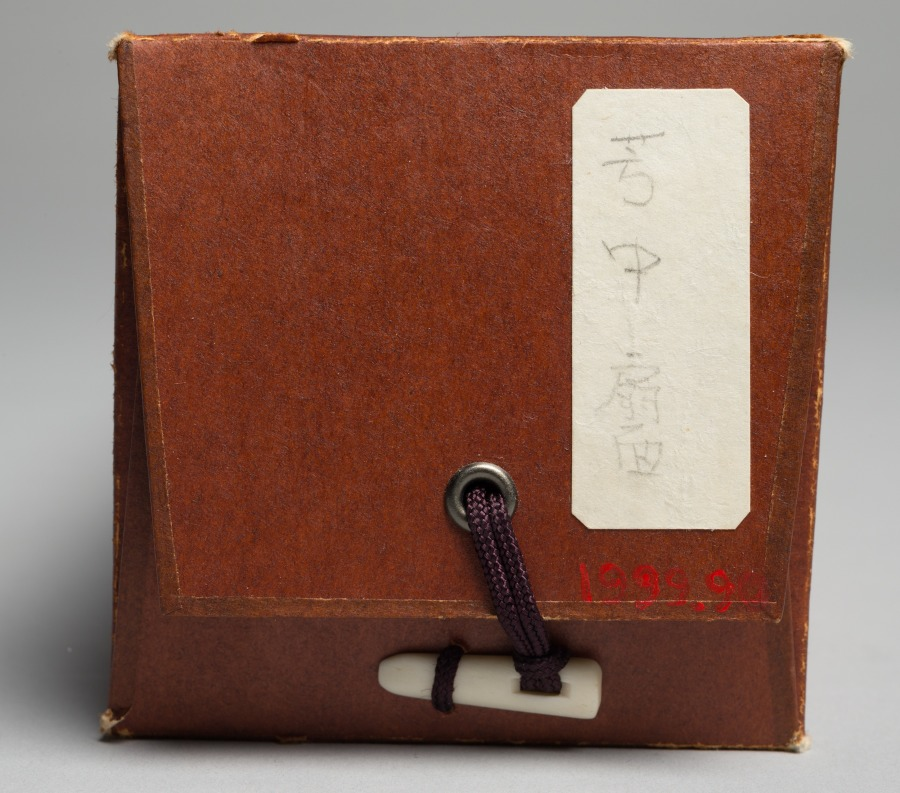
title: Waves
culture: Japan, Edo period (1615–1868)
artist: Nakamura Hōchū (Japanese, d. 1819)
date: late 1700s-early 1800s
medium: fan painting mounted as a hanging scroll; ink and color with gold on paper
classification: Painting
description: Nakamura Hōchū painted waves on this handheld fan to bring coolness to the mind of its bearer. While fragile paper fans are often used for a single season, this one was cherished for its design. Someone carefully removed it from its folding apparatus and converted it into a hanging scroll for occasional enjoyment in an alcove.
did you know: Nakamura Hōchū took inspiration for his work from the painter Ogata Kōrin.